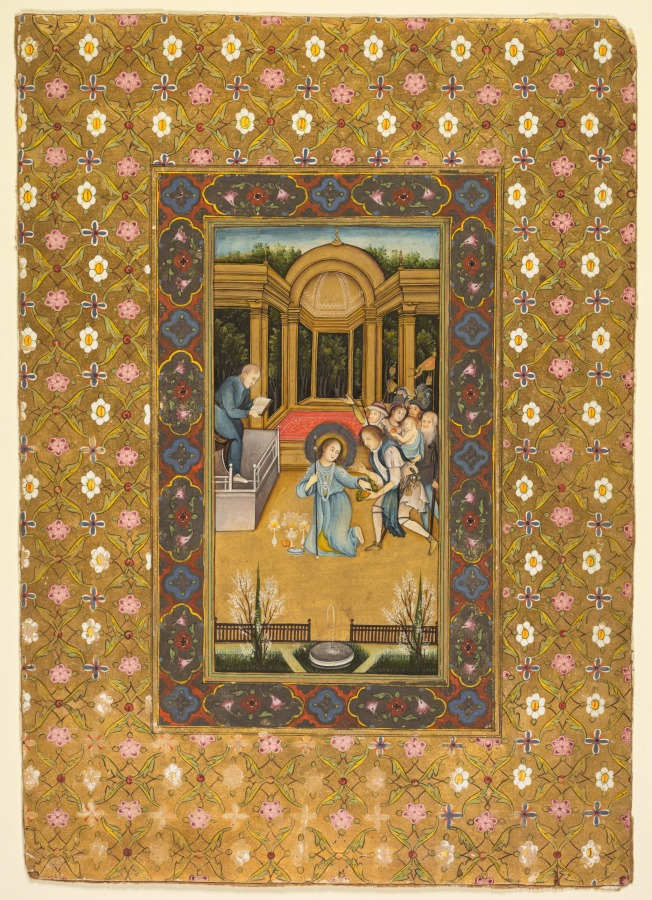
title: Jesus among the doctors in the Temple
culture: India, Lucknow, Mughal, 18th century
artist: Mir Kalan Khan (Indian, c. 1730–1775)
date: c. 1760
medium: Gum tempera and gold on paper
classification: Painting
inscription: Persian inscription on verso: an image of Blessed Miriam, work of Mir Kalan Khan